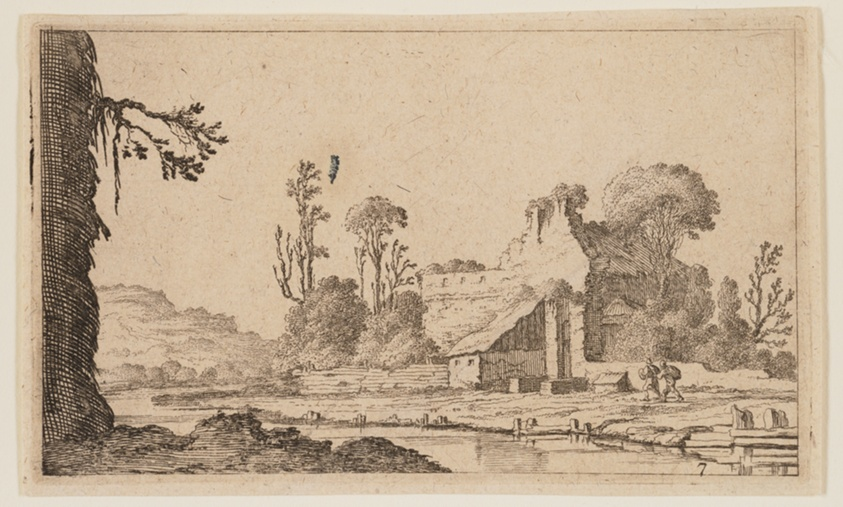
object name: Print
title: Ruins Transformed into a Farm on a River, from Twelve Landscapes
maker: Gillis van Scheyndel (Dutch, 1595–1660)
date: c. 1605-1650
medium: Etching on ivory laid paper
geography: Netherlands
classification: etching; paper; print; prints and drawing